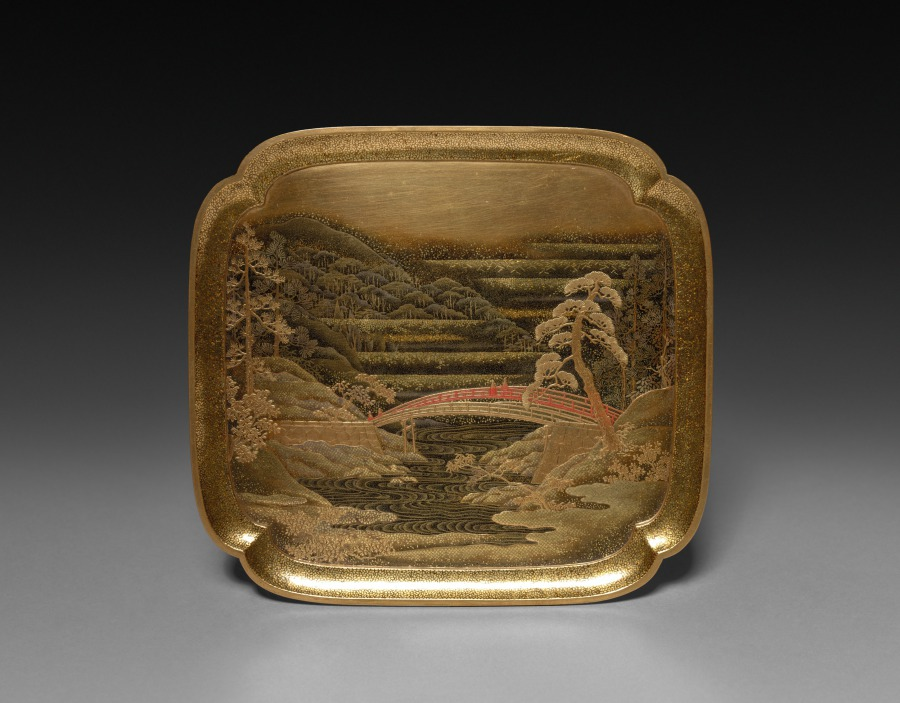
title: Tray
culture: Japan, Meiji period (1868–1912)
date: late 1800s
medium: wood with lacquer and gold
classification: Lacquer